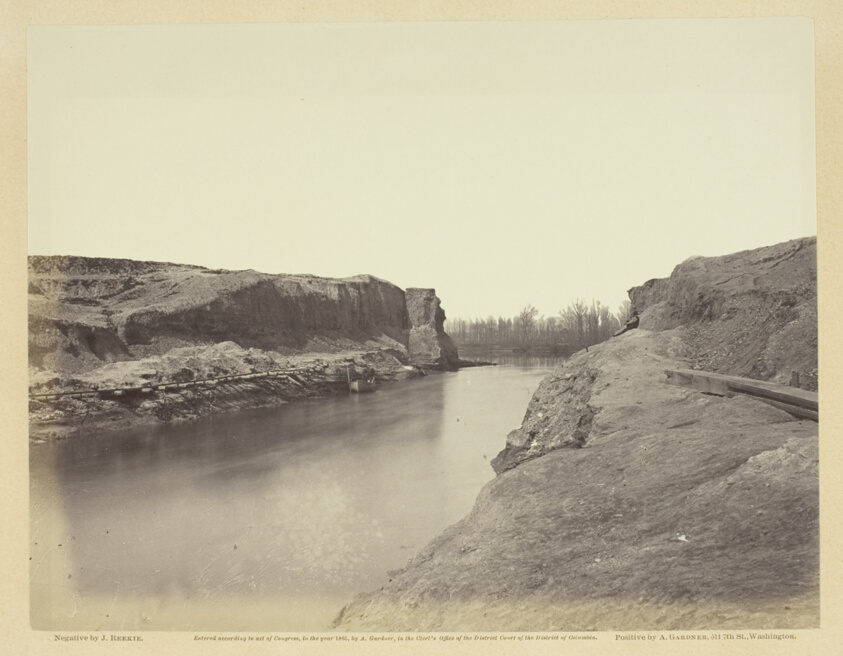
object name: Photograph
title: Dutch Gap Canal, James River, Virginia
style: 19th century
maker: John Reekie (American, active 1861–1865); printed by Alexander Gardner (American, born Scotland, 1821–1882)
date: March 1864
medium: Albumen print, pl. 87 from the album "Gardner's Photographic Sketch Book of the War, Volume II" (1866)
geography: United States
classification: albumen silver print; photographic process; photography; photograph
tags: Collected by Hugh Edwards, Gardner's Photographic Sketch Book